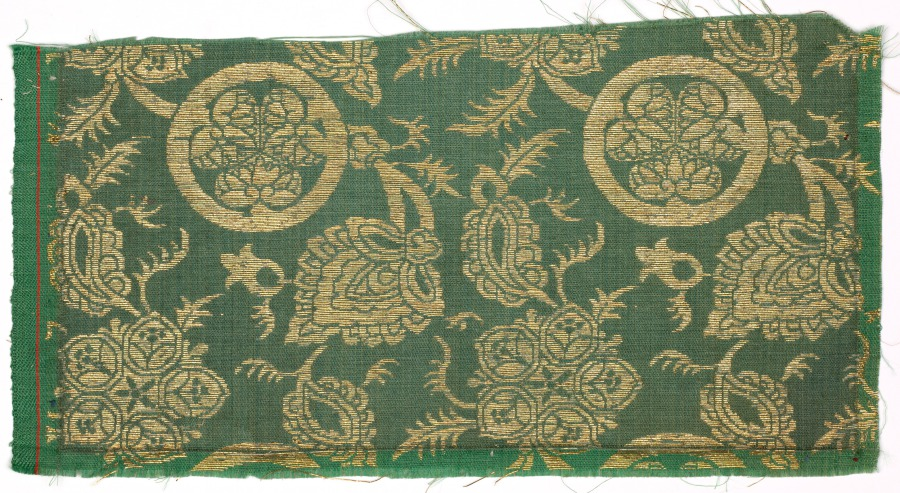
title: Textile Fragment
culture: Japan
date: 1800s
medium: silk, metallic thread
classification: Textile